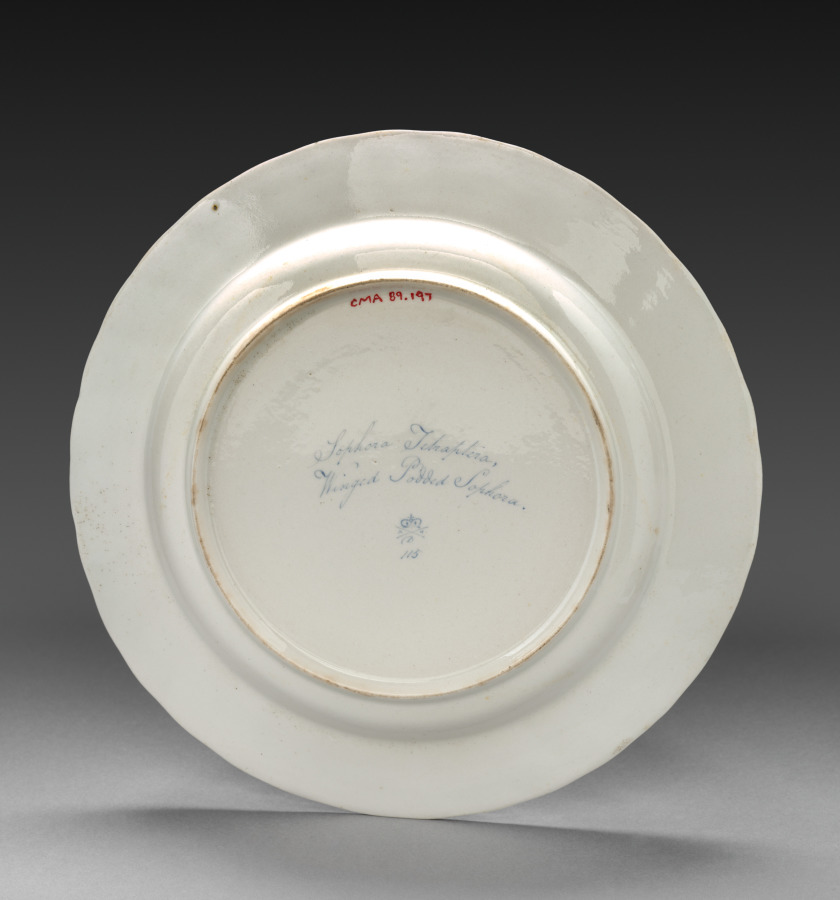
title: Plate from Dessert Service: Winged Podded Sophora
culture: England, Derby, 18th century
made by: Derby (Crown Derby Period) (British)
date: c. 1800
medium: porcelain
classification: Ceramic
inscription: inscribed in blue on back: Sophora Tetrapteria./Winged Podded Saphora./crown/crossed batons and dots/D/115.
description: Each dish is decorated with recognizable plants, the names of which are inscribed on the base in both Latin and English. Identifying the blossoms only became customary in the late 18th century when a single piece of porcelain was decorated with one species, and flowers were represented along with leaves, stems, seed pods, and roots. All of this reflects Carolus Linnaeus’s recent invention of a scientific method to categorize all known flora. The decorations on the Derby factory’s products derive from contemporary English botanical publications. For instance, illustrations in William Curtis’s The Botanical Magazine served as models for the French marigold and nettle-leaved bell flower on the dessert service.